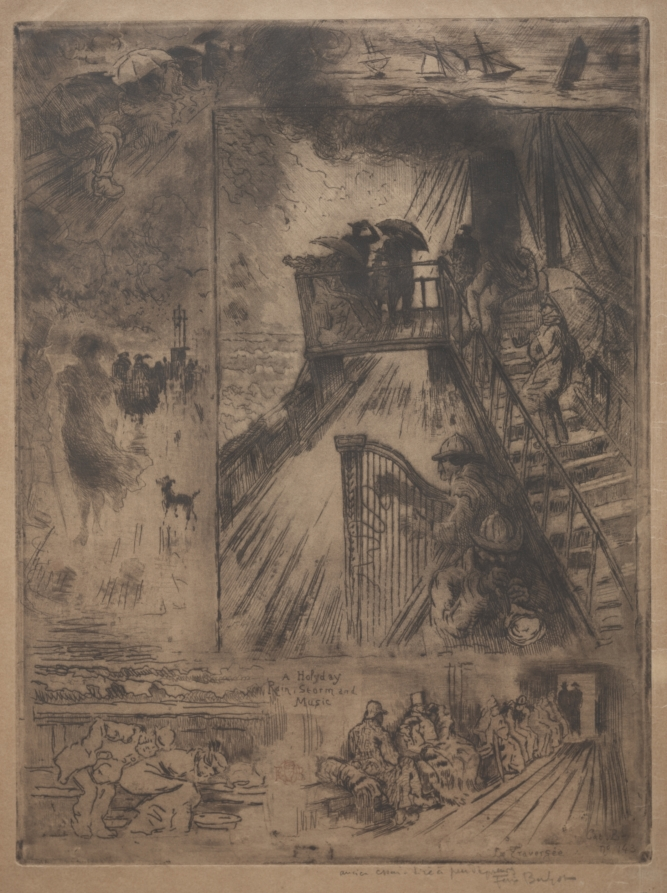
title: The Crossing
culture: France, 19th century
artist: Félix Hilaire Buhot (French, 1847–1898)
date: c. 1880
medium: etching, aquatint, drypoint, and roulette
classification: Print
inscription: inscribed, lower left, in graphite: ancien [...] tire á peu d'epreuves Felix Buhot; lower center (in image), in plate: A Holiday/Rain, Storm and/ Music; lower right, in plate: La Traversée Cat. B No. 143